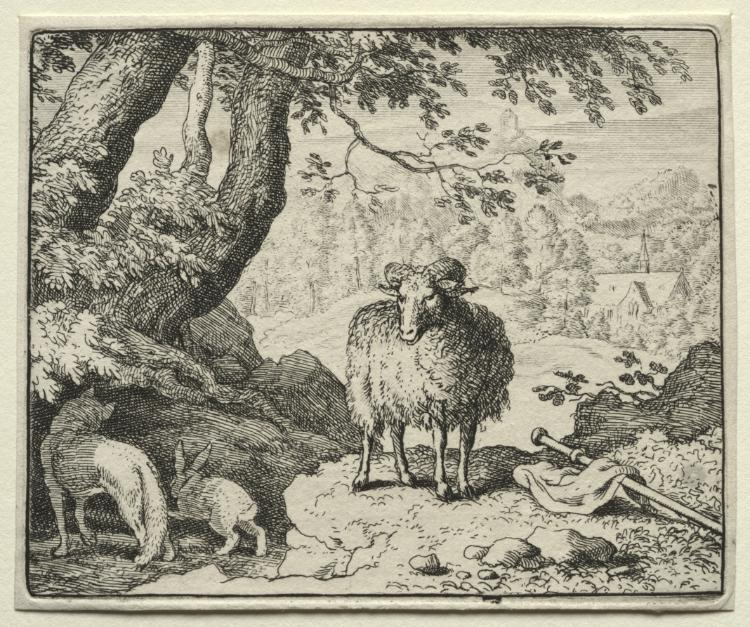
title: Reynard the Fox: Reynard Returns Home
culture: Netherlands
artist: Allart van Everdingen (Dutch, 1621–1675)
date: 1650–75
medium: etching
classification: Print